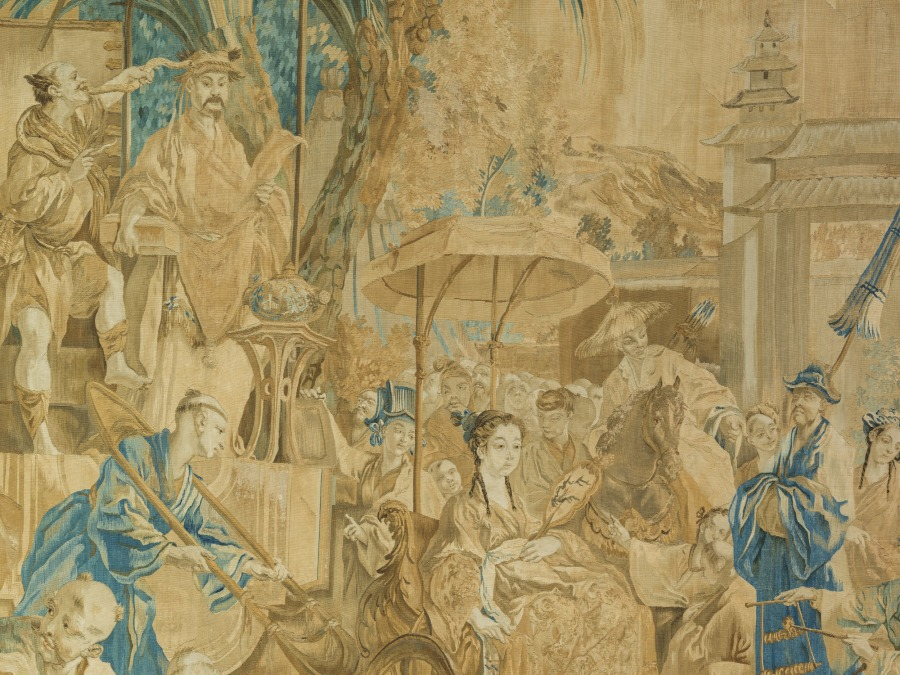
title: Chinese Fair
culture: France, 18th century, Period of Louis XV (1723-1774)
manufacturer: Beauvais (French)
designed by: Jean Joseph Dumons (French, 1687–1779)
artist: after a design by François Boucher (French, 1703–1770)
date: 1723–74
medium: tapestry weave: silk and wool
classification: Tapestry